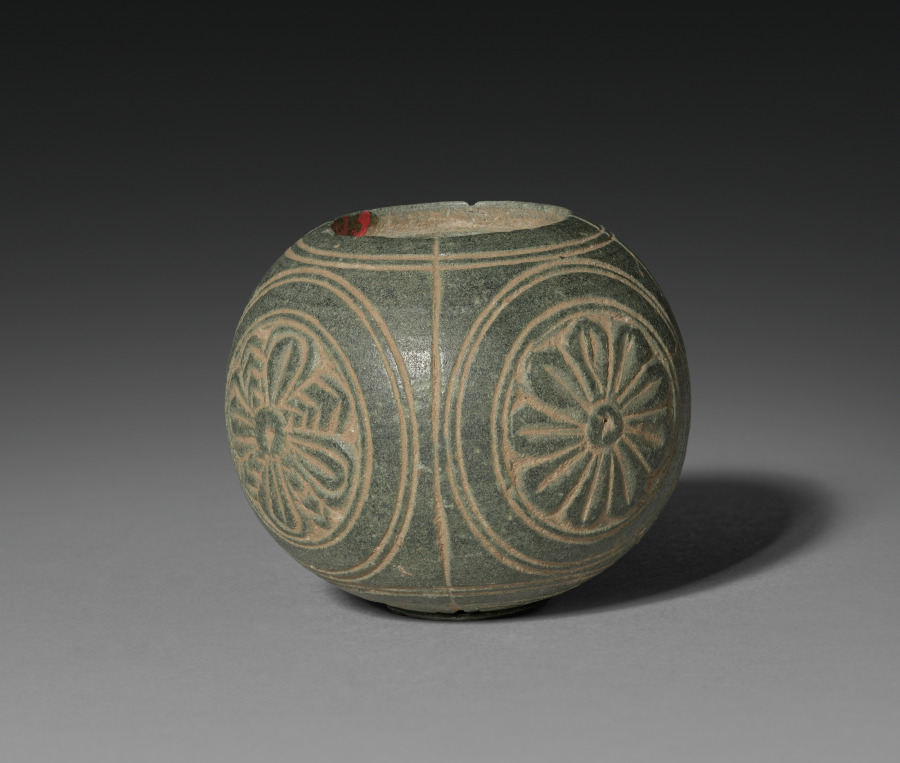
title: Miniature Stone Reliquary or Toilette Casket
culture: Pakistan, Gandhara, probably Sirkap, early Kushan period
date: 1–100 CE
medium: gray schist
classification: Sculpture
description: Tiny reliquaries holding the cremated remains of the Buddha or a high-ranking holy person empowered monuments and made them sacred. A Buddhist monument, such as the solid hemispherical mounds called stupas, would not be worshipped until it was consecrated with the relic secreted inside. Bits of ash were combined with tiny gems inside a crystal or glass reliquary, which was then placed inside a stone or metal container, like the lidded versions seen here. These containers look like cosmetic vessels for aromatic pastes used for perfume in ancient India. Buddhist texts state that the enlightened Buddha emitted a fragrance like sandalwood paste; the form of the reliquary as a perfume bottle indicates the presence of the Buddha by the visual reference to his pleasant scent. Once enclosed in the stupa the reliquaries would not be seen, but monks were tasked with applying sandalwood paste to the exterior of stupas as part of their regular maintenance to convey to visitors the ongoing presence of the Buddha radiating from the relic in the center.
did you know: The knob of the lid is gilded, as is the interior of the casket.